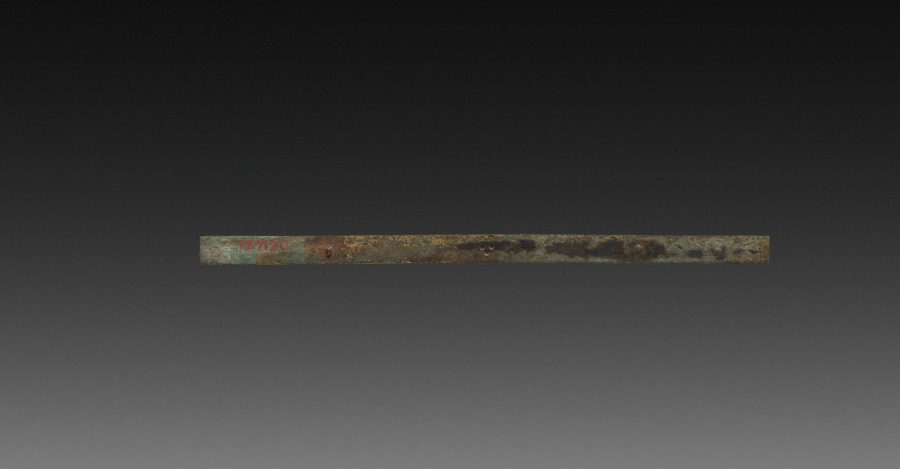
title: Ornamental Detail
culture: France, late 18th century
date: late 1700s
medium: gilt bronze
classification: Metalwork